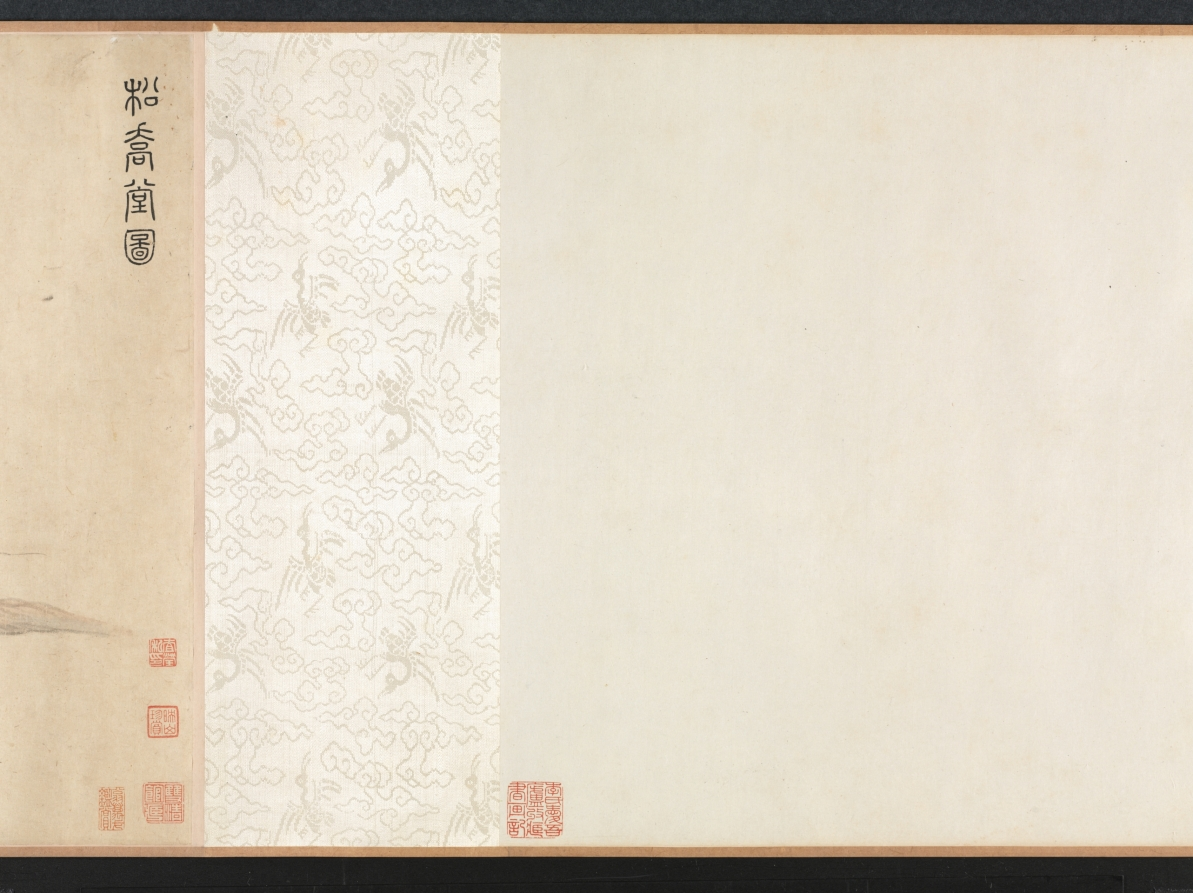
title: Hall of Lofty Pines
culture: China, Qing dynasty (1644-1911)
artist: Wang Hui (Chinese, 1632–1717)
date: 1703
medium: handscroll; ink and color on paper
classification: Painting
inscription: [題] 松喬堂圖 康熙癸未夏六月, 海虞耕煙散人王翬畫。[印]王翬之印; 石谷. [左下] 來青閣; 耕煙野老時年七十有二.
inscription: 松喬堂圖一卷，海虞石谷王君為靜海近公厲少司冦公作也。圖成于癸未之夏。未幾而公遂仙去。公令子今編修君南湖屬余題跋其後。余與公同官侍從，交契最深。側見公之清修純德，蔚為聖天子所眷重。侍直內廷，密勿贊襄，幾二十餘年。蒼生之所以受賜，士林之所以沐德者，天下莫能窺，在廷莫能悉。而公卒不言。以故宸衷日益契，恩禮亦日益渥。雖年逾懸車，時有歸老之念。而上固不聼公之去。其所謂松喬堂者，御書以賜公者也。蓋以松比公之清風勁節，而歲寒不改，經霜彌茂。則又以期公之壽考未有艾焉。公知此身未易乞，而山林槃磵之樂，止可寄諸寤思。此松喬堂圖之所由作也歟。石谷此圖，結構精密，筆墨超邁。其寫樹木之蒼蔚，堂宇之靚幽。恍見摩詰輞川樂天廬山之勝。獨惜公未得一日徜徉故園以償其願。即繪於圖亦未得以永其趣，此編修君之所以眷眷不忘也。雖然千歳之松喬，下蔭百畝，上以修棟梁之需。然則上當日名堂之意，不更望於後之人襲其芘而養其材也哉。吾願編修君之寶斯圖。并望君之塗塈丹雘，大其堂構也已矣。 康熈丙戍重陽三日，雲間王鴻緒跋。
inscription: 10 additional seals: 1 seal of Li Duna 勵杜納 (1628–1703); 4 seals of Zha Ying 查瑩 (jinshi of 1766); 5 seals of Li Yun (dates unknown).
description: Wang Hui 王翬, a leading painter in the orthodox school of the early Qing dynasty (1644–1911), was commissioned to paint this landscape with a country estate for Li Duna 勵杜納 (1628–1703), vice minister of justice in Emperor Kangxi’s court. The emperor had honored Li by granting him a piece of calligraphy with the name of Li’s retirement retreat, “Hall of Lofty Pines.” He drew a comparison between pines and Li’s upright character, resilience, and longevity. Wang Hui’s painting was supposed to allow Li to imagine living in a beautiful, secluded compound among the hills and pines. Sadly, Li died before seeing the completed painting and before receiving the emperor’s permission to retire. The landscape begins with peaceful riverbanks and low hills. The pines around the estate in the middle of the handscroll are truly lofty, some stretching even beyond the frame of the painting. Li Duna, the estate’s owner, is shown twice in his serene mountain retreat: first approaching the entrance to the compound with two servants at the right, and then later in the scroll, to the left, reading in the comfort of an inner room.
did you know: One servant carries the estate owner's carefully wrapped qin, a type of zither.